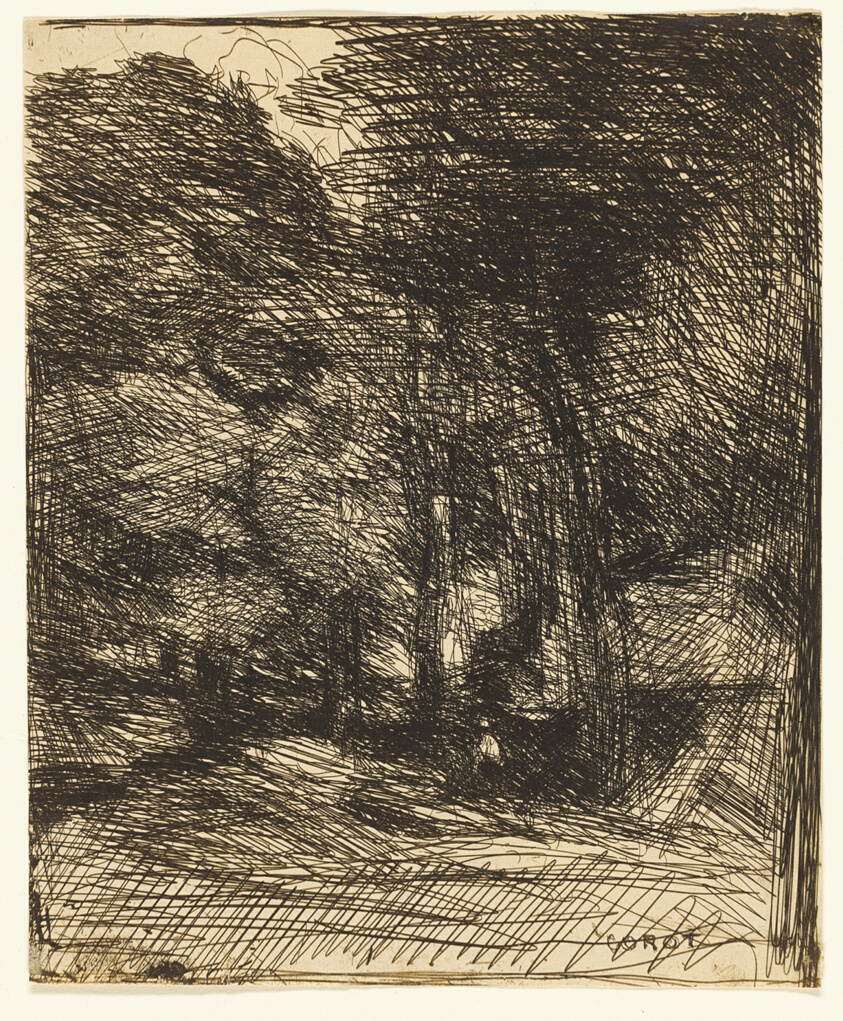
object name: Print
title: Souvenir of Bas-Bréau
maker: Jean-Baptiste-Camille Corot; French, 1796-1875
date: 1858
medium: Cliché-verre on ivory photographic paper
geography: France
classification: cliché-verre; print; prints and drawing